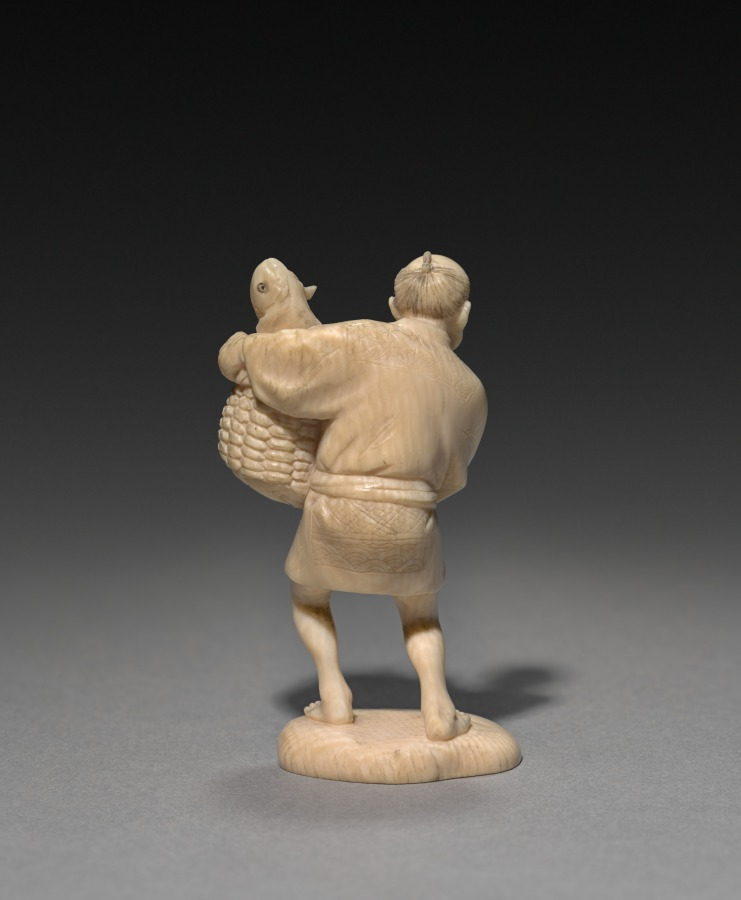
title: Man Carrying a Basket of Fish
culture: Japan, Meiji period (1868–1912)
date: early 1900s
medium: ivory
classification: Ivory